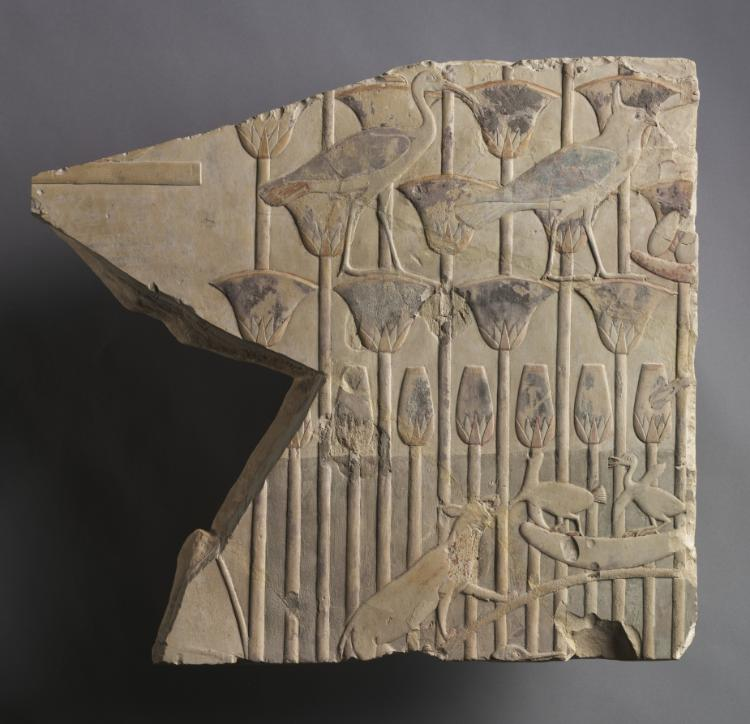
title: Marsh Scene with Cat and Birds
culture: Egypt, Late period (715–332 BCE), Dynasties 25–26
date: c. 667–647 BCE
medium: limestone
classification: Sculpture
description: In a great papyrus swamp a civet cat attacks a bird's nest. Above are a hoopoe bird and a crane. Probably the mongoose was shown at the left attacking another nest. The scene is essentially copied from Old Kingdom work, but some details show New Kingdom influence.